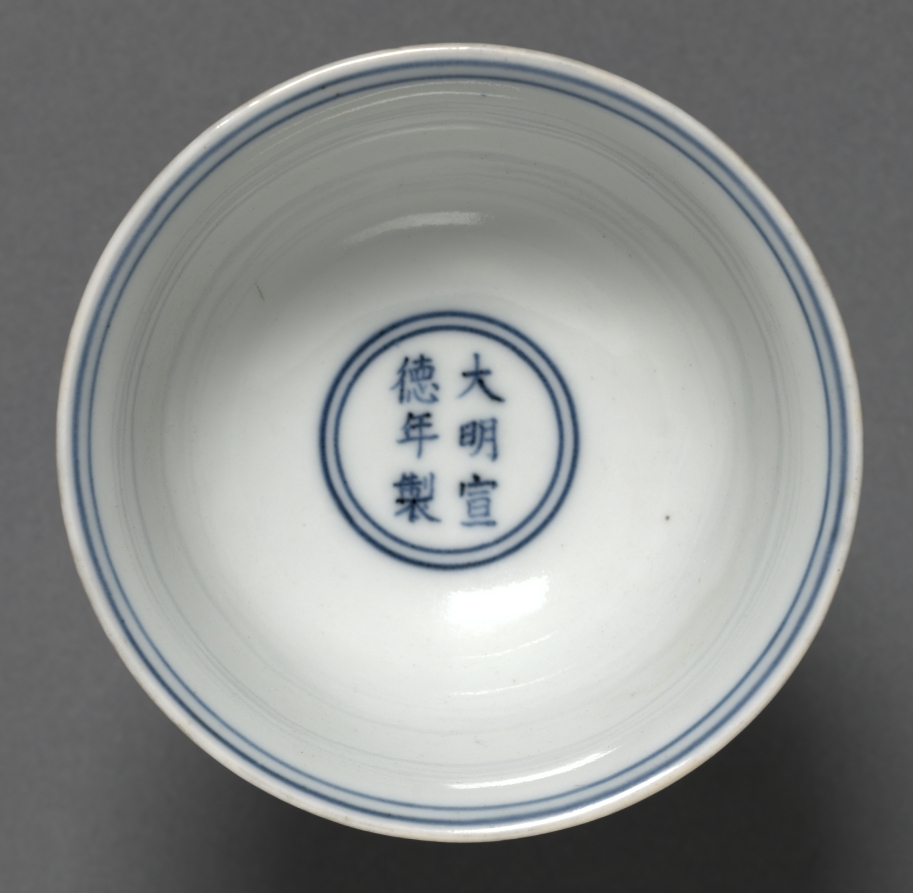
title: Stem Cup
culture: China, Jiangxi Province, Jingdezhen, Ming dynasty (1368–1644), Xuande mark and period (1426–35)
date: 1426–35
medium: porcelain with underglaze blue and overglaze red enamel decoration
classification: Ceramic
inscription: 大明宣德年製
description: These two Ming imperial wares [CMA 1957.60 and CMA 1957.61] are among the smallest, but most precious, of the museum's holdings in Chinese ceramics. The luminous glaze, gestural freedom, and vibrant color are perfectly unified to fit the delicate shapes of these luxury items.